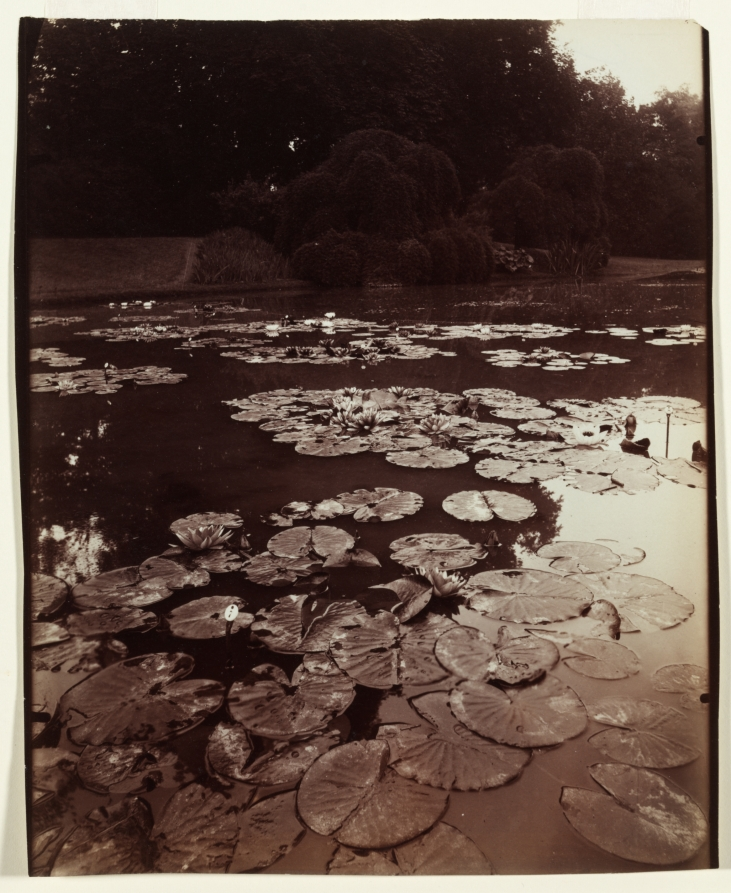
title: Nymphéa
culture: France, 20th century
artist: Eugène Atget (French, 1857–1927)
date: 1922–23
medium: albumen print, gold-toned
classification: Photograph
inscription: written in pencil on verso: "Nymphea"; "MOMA/DUPE/2002"? "(initials)?"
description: A prolific Parisian artist who enjoyed a three-decade career, Atget was one of the most important and original photographers active at the beginning of the 20th century. This sparkling landscape of a mass of white water lily blossoms (Nymphéa) is among Atget's best compositions, created in the 1920s, when he was at the height of his artistic prowess. This scene, full of luxurious botany, was probably taken in Bagatelle Park at the edge of Paris's Bois de Boulogne. He carefully focused on the floating plants and their sculptured flowers, detailing texture and shape. The early morning illumination created light and shadow patterns that enabled Atget to isolate flat, abstracted forms while simultaneously depicting a deep pictorial space. In this lush, purplish print, the lily pond shimmers with reflected shadows and brilliant highlights.